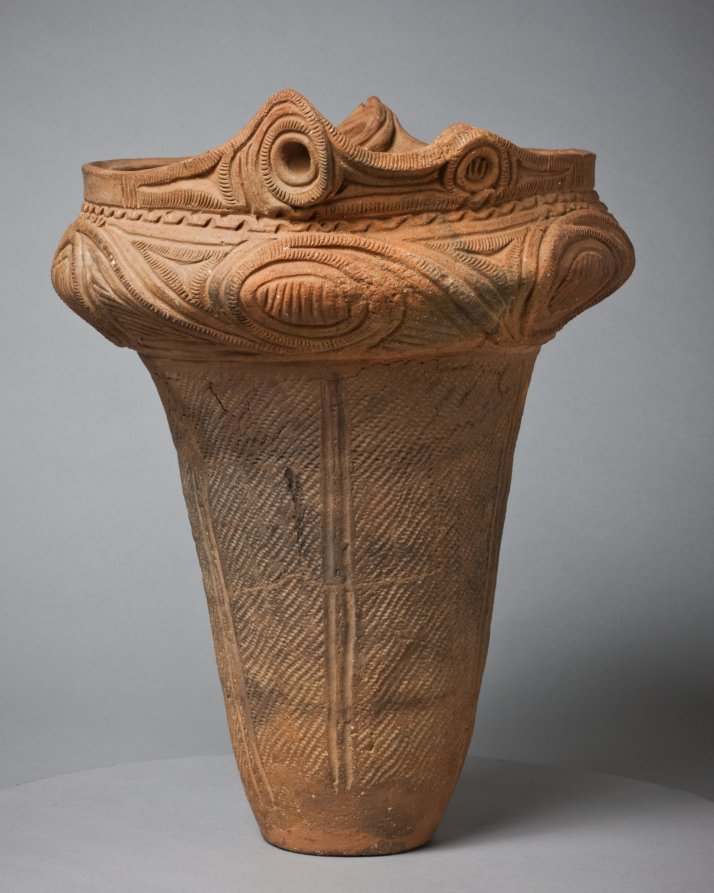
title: Urn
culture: Japan, Jōmon period (c. 10,500–300 BCE)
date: c. 2000 BCE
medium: earthenware, terracotta, impressed and incised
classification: Ceramic